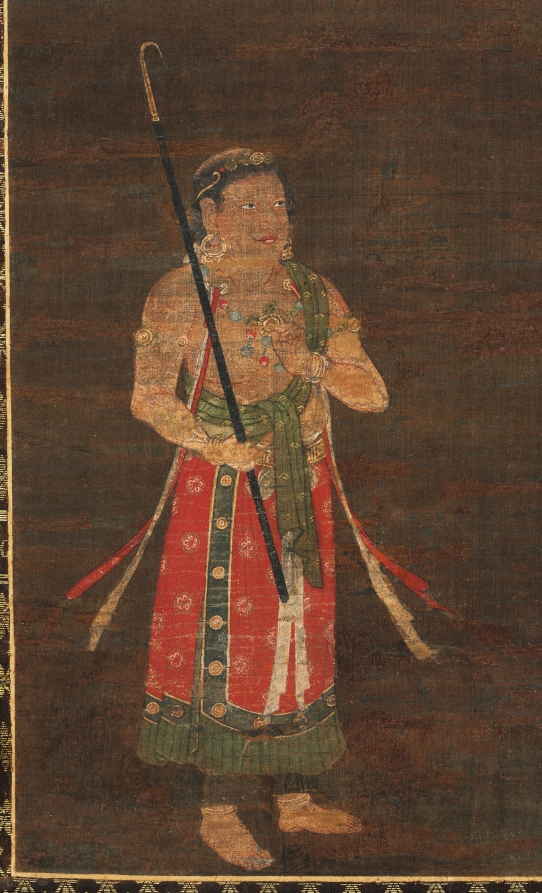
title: Shakyamuni Triad: Buddha Attended by Manjushri and Samantabhadra (Bodhisattva with Elephant)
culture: China, Fuzhou, Fujian Province, Yuan dynasty (1271-1368)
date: late 1300s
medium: Hanging scroll; ink and color on silk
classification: Painting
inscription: Inscription at the bottom of the central scroll reads: "Da Song Fuzhou fu…(Fuzhou prefecture of the great Song)."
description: This triptych is a rare example of Yuan Buddhist painting. It depicts the historic Buddha Shakyamuni flanked by two attending bodhisattvas, Manjushri (the bodhisattva of wisdom, riding a lion) and Samantabhadra (the bodhisattva of universal virtue, riding an elephant). Below them are others seeking enlightenment: two disciples of the Buddha (Ananada and Kasyapa), two non-Chinese people, a boy with topknots, and a female worshiper. The clouds above and around the divine beings form one scene that illustrates Shakyamuni’s sermon from the Lotus Sutra. This text became an important basis for Buddhist faith throughout East Asia and was central to the Mahayana school of Buddhism.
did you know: Samantabhadra, the bodhisattva of universal virtue, is mounted on a six-tusked white elephant standing on lotus flowers.